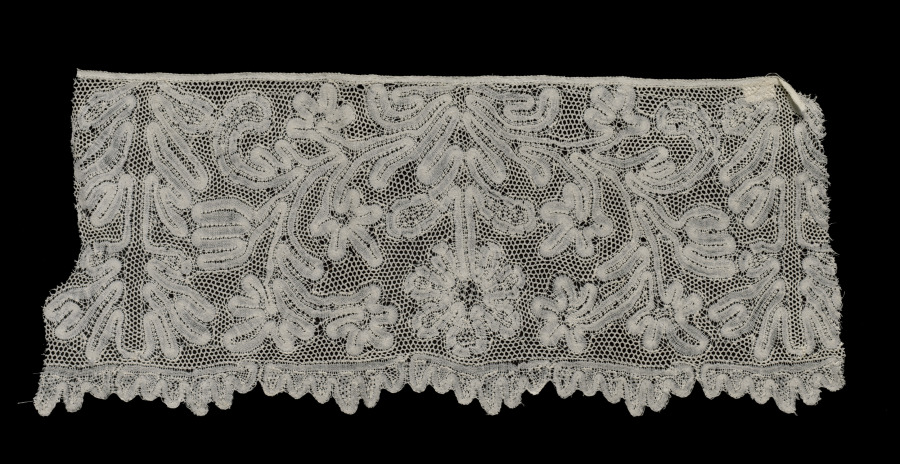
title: Lace Edging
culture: Flanders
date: 1600s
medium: Linen: bobbin lace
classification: Lace